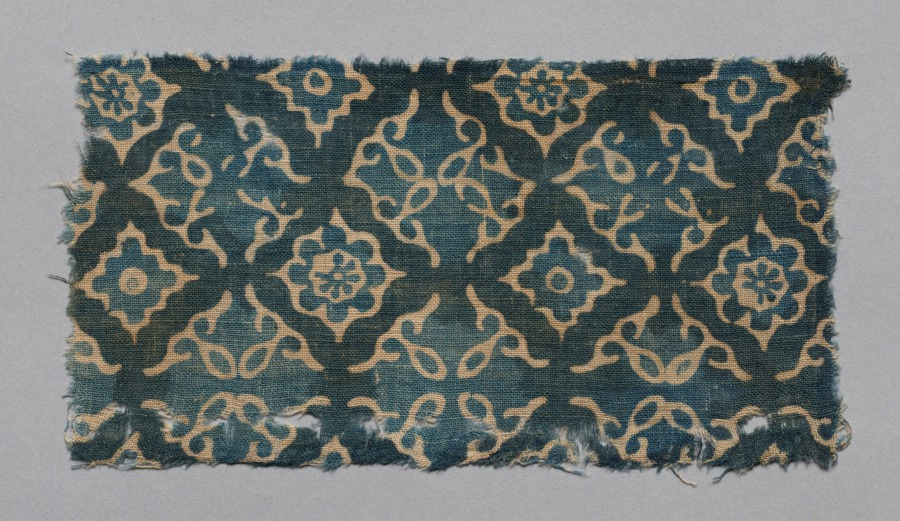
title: Fragment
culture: India, 12th-14th century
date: 1100s - 1300s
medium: plain cloth, resist dyed; cotton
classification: Textile